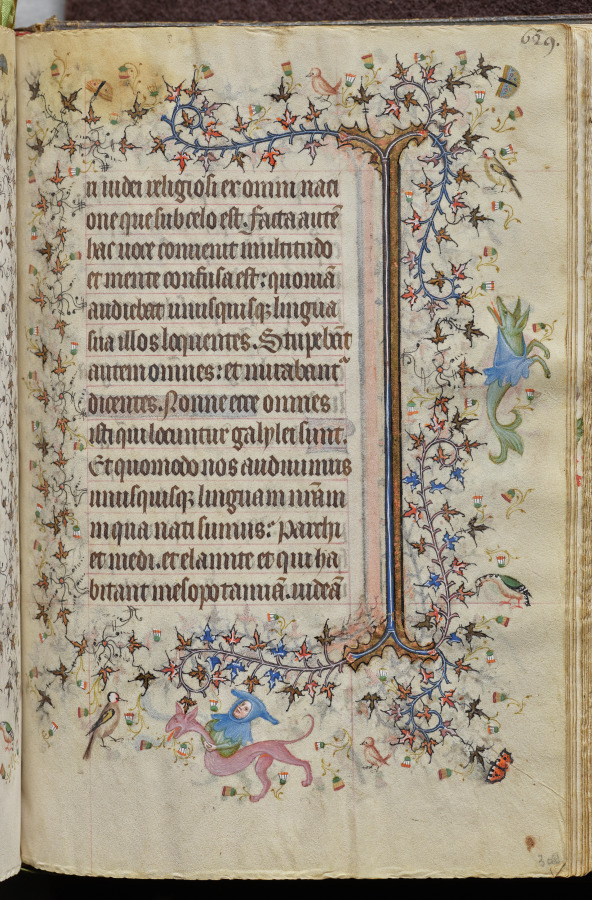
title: Hours of Charles the Noble, King of Navarre (1361-1425), fol. 309r, Text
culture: France, Paris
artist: Master of the Brussels Initials and Associates (French)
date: c. 1405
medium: ink, tempera, and gold on vellum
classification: Bound Volume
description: This precious volume was obviously highly prized by its owner, the French-born King of Navarre, who had his coat of arms painted on no less than twenty folios. Rather than directly commissioning this manuscript from a specific workshop, it seems that Charles the Noble acquired his book of hours -- perhaps ready-made for the luxury market -- while on a trip to Paris in 1404-05. A collaborative effort, six painting styles are evidenced within the pages of this codex, those of two Italians, two Frenchmen, and two Netherlanders. The painter who was responsible for the planning and decoration of the book, and who produced seventeen of the large miniatures, was a Bolognese artist known as the Master of the Brussels Initials. His principal assistant, responsible for most of the borders, was a Florentine who signed his name "Zecho" da Firenze on folio 208 verso.